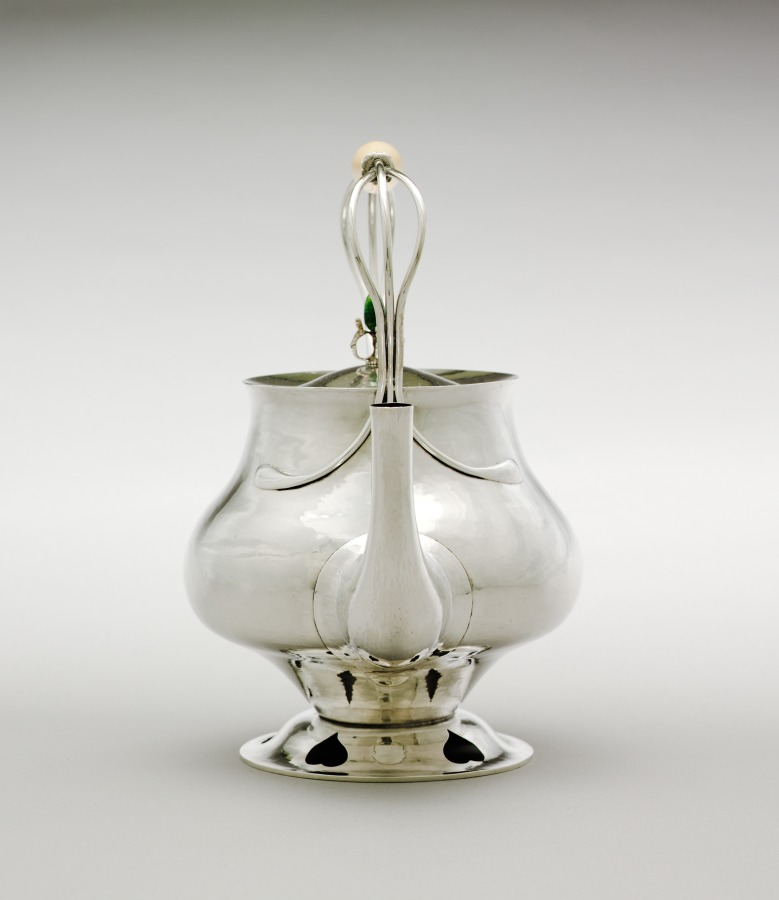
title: Kettle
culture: England, late 19th-early 20th Century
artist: Charles Robert Ashbee (British, 1863–1942)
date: 1900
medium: silver with ivory handle and chrysoprase finial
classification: Silver